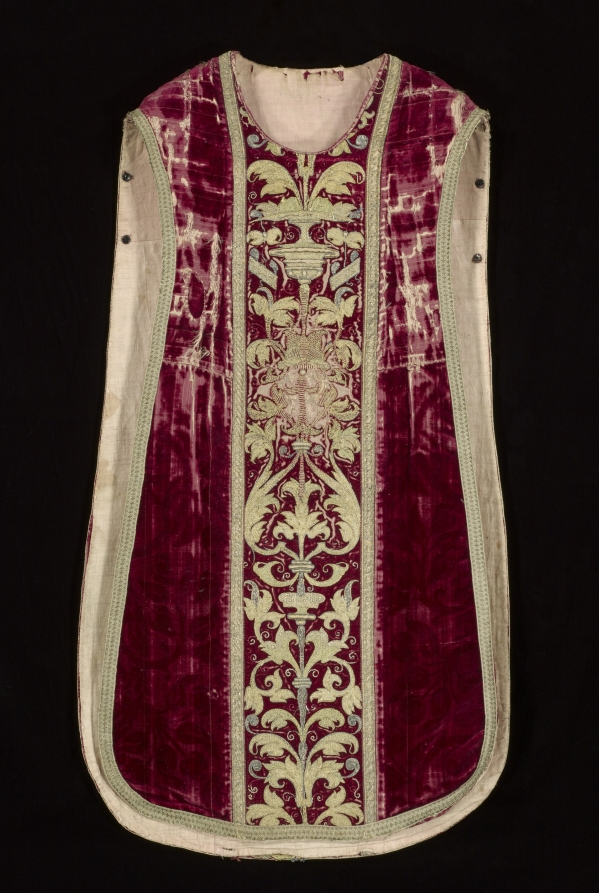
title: Chasuble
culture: Spain, late 16th century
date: late 1600s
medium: Silk, velvet, embroidery on orphrey metallic thread, or nué (shaded gold)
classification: Velvet